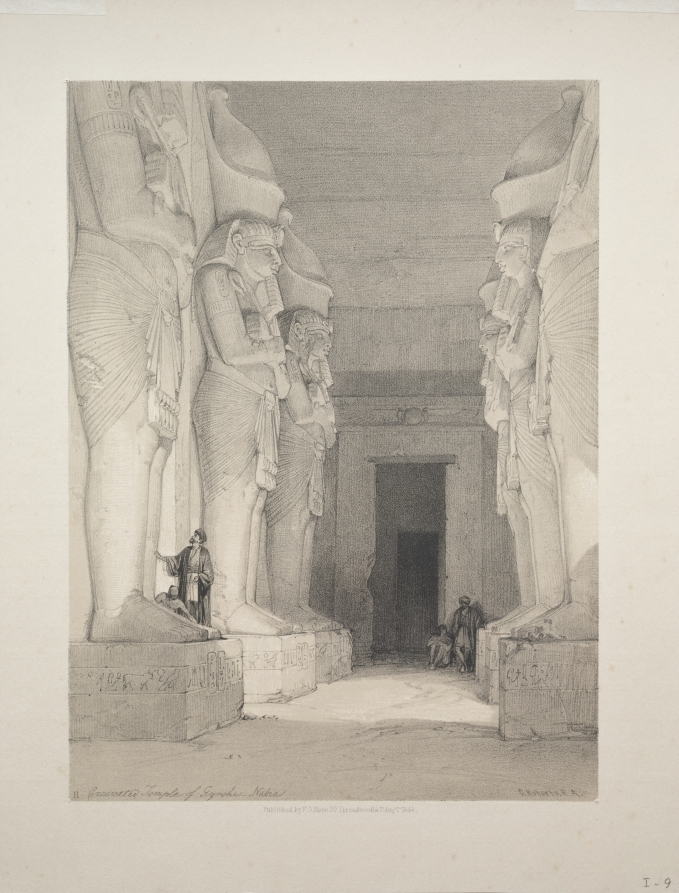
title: Egypt and Nubia: Volume I - No. 9, Excavated Temple of Gyrshe, Nubia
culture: England, 19th century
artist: Louis Haghe (British, 1806–1885)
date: 1838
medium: color lithograph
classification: Print